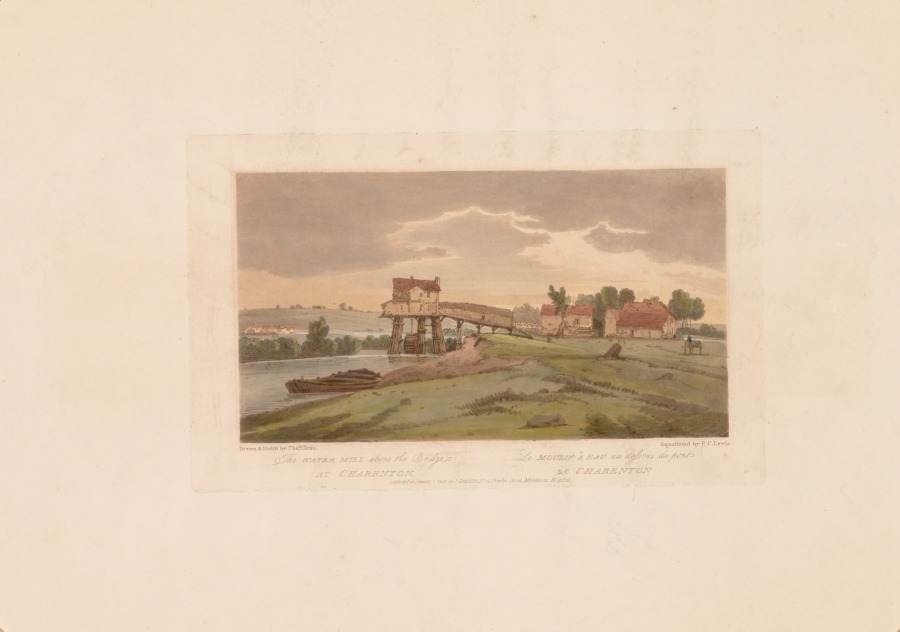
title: A Selection of Twenty of the Most Picturesque Views in Paris: The Water Mill above the Bridge at Charenton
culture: England, 19th century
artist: Thomas Girtin (British, 1775–1802)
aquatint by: Frederick Christian Lewis (British, 1779–1856)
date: 1803, printed 1810 or after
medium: softground etching and aquatint printed in brown, hand-colored with watercolor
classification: Print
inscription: In plate; Drawn & Etch'd by Thos Girtin; Aquatinted by F. C. Lewis; LONDON: Pubd January 1 1803 by Thos & John Girtin, No. I, Little Newport Street, Gerrard Street, Soho.